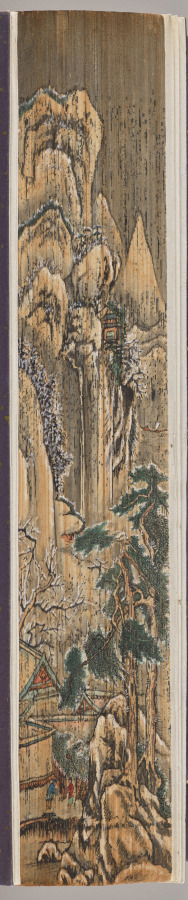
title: Yu-hai (The Ocean of Jade)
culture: China, Ming dynasty (1368–1644)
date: 1368–1644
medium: woodblock-printed book with painted edges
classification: Bound Volume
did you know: When each book is rolled to form a cylinder, a landscape appears on the edges, painted in ink and washes of color.